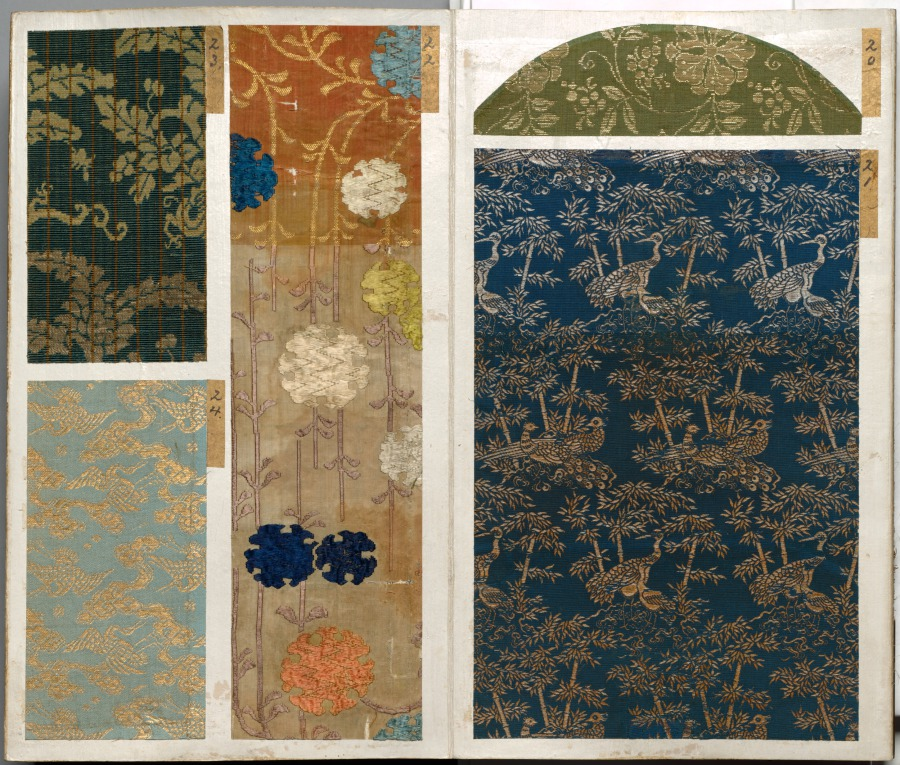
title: Album of Textile Samples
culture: Japan, Edo period (1615–1868)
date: 1600s-1700s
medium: silk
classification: Textile